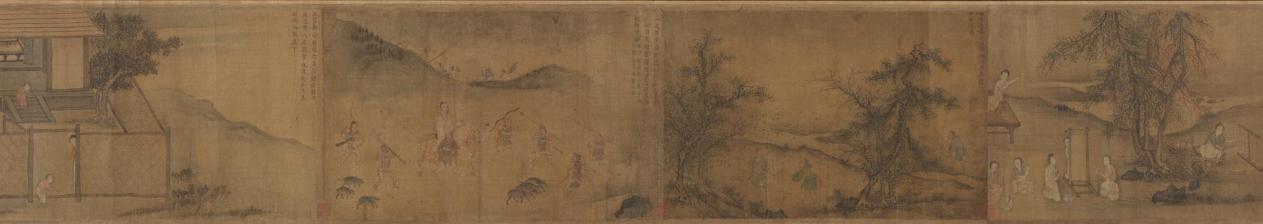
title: "Seventh Month" from the Odes of Bin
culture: China, Southern Song dynasty (1127-1279)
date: 1200s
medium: Handscroll; ink and color on silk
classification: Painting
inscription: Colophons: 1. [on the frontispiece] by the Qianlong emperor (dated 1741). 2. by Lu Wan (dated Zhengde dingchou, 1517). 2. by the Jiaqing emperor (dated 1807).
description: According to Confucian thought, the ruler looks after the well-being of his people which involves agricultural activities. Seventh Month from the ancient Odes of Bin in the Shijing (Book of Poetry) describes occupations throughout the year, including plowing, harvesting, hunting, making clothes, and observing rituals. The earliest illustrations of these Odes accompanied by text were commissioned by Southern Song emperor Gaozong (reigned 1127–1162). As the lower Yangzi delta had become the new seat of government, Gaozong had sets of these illustrations produced by court artists to revive the dynasty and convince the Confucian officialelite of his legitimacy to rule.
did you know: The Odes of Bin appears in the classic Shijing (Book of Poetry), an anthology of more than 300 poems, folk songs, and ceremonial hymns that were originally chanted to music.